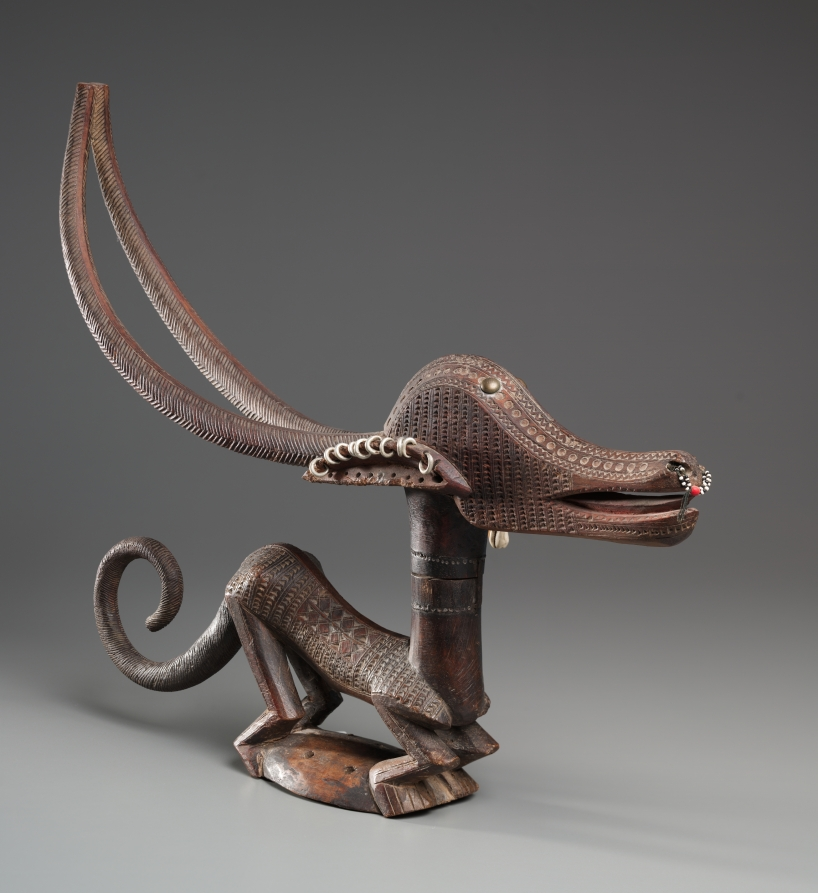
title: Headdress (chi wara)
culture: Africa, West Africa, Mali, Bamana-style blacksmith-carver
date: early to mid-1900s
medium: Wood, cowrie shells, glass beads, possibly aluminum, iron alloy, upholstery studs, and natural fibers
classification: Mask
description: Chi wara—a mythical “farming beast”—was said to teach farming to the Bamana people. Carved patterns cover this female chi wara’s body, highlighting its muscles and emphasizing that it is no earthly animal, but rather an agricultural spirit that combines human, antelope, and anteater elements. This example wears earrings and a nose ring of imported metals and beads. Its carver—a blacksmith—used a naturalistic style common south of the city of Bamako. Accompanied by women’s songs, male performers danced paired male-and-female chi wara headdresses affixed to basketry caps at agricultural competitions and weddings.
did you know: Chi wara headdresses look different depending on the region they were made in. The style of this example tells us it was likely made in the Djitoumou region of southern Mali.